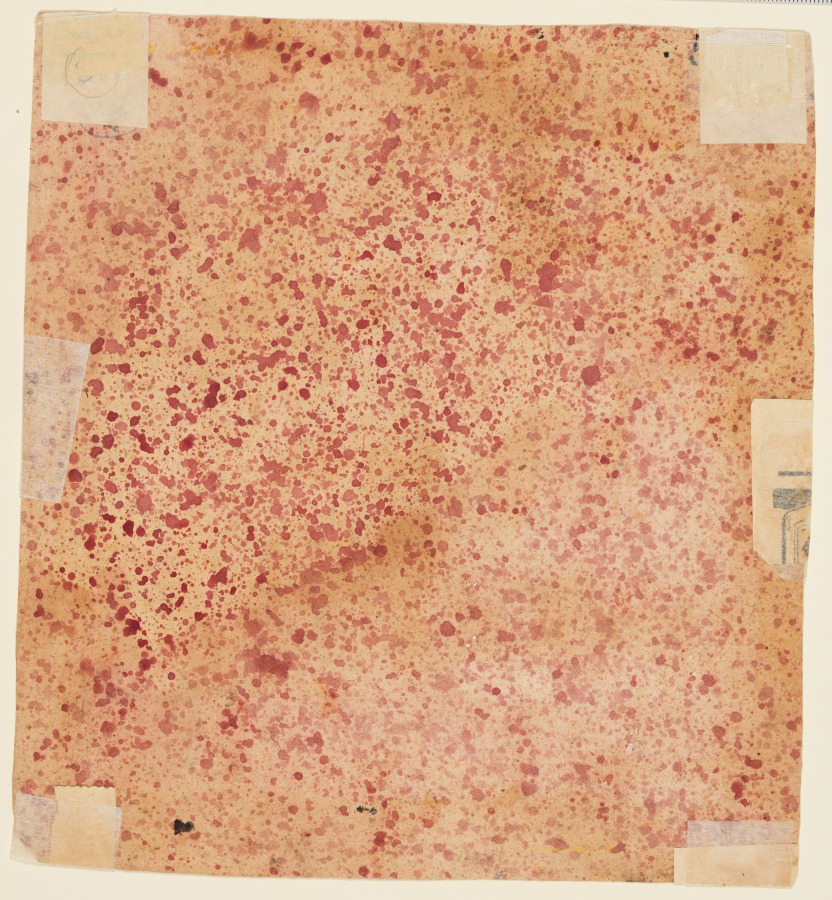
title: A Woman Plucks Leaves While Awaiting Her Lover: Gunakali Ragini of Malkos, from the “Chawand Ragamala”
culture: Northwestern India, Rajasthan, Rajput Kingdom of Mewar, Chawand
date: 1605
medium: gum tempera and ink on paper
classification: Painting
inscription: ratosukā kaṃta patha pratīkṣamā yādayotī. mṛdu pukṣya talya itistata. prerita dṛkhi rātrau traya maṃgi kagaimakari padiṣta. 2. gunakarī rāgiṇī 31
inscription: Inscribed: “Goundakari Ragini” with the number 31 in the lower right corner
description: On a terrace outside an open bedchamber, a dark-skinned woman wearing a skirt of peacock feathers plucks leaves from a tree and has filled her basket with flowers. She has made garlands and hung them on the trees, probably in accordance with a vow made in the ardent hope of bringing back her overdue lover. In accordance with the verse, two peacocks stand perched on the roof.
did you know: She has lit a six-flame lamp at the foot of the tree in her vigil.